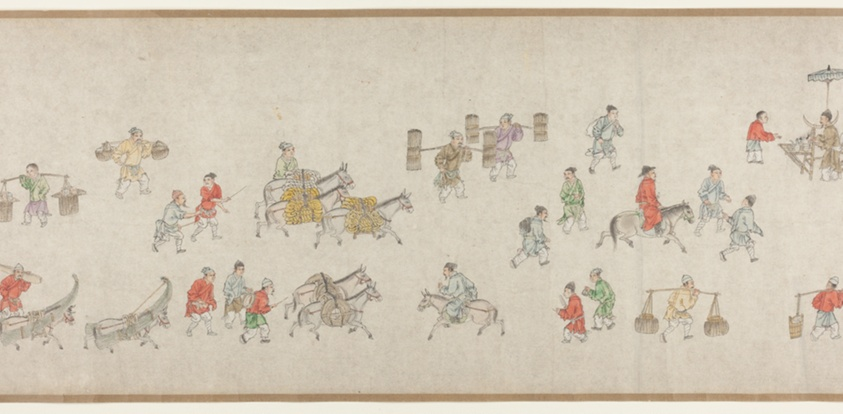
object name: Painting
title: Street Scenes in Times of Peace 太平風會圖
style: Chinese (culture or style)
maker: Zhu Yu (Zhu Junbi) 朱玉（朱君璧）; Chinese, 1293-1365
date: Yuan dynasty (1279–1368), 14th century 元朝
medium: Handscroll; ink and colors on paper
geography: China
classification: handscroll; painting; asian art